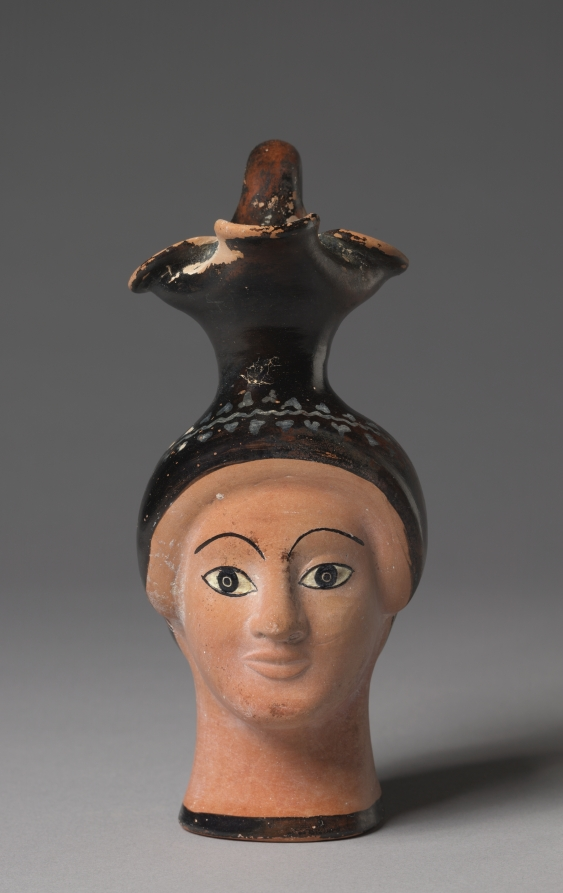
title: Oinochoe (Wine Jug) in the Form of a Woman's Head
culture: Greek, Attic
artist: associated with Class N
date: c. 475–450 BCE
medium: ceramic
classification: Ceramic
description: Mold-made vases in the form of human heads became popular in Athens in the fifth century BC. Although some represent male figures (including Herakles, Dionysos, and satyrs) and often take the form of drinking cups, wine jugs in the form of women’s heads are most common. Unusual on this example are the incised ears.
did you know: The artist used white paint for the eyes and an ivy wreath, now partly lost.